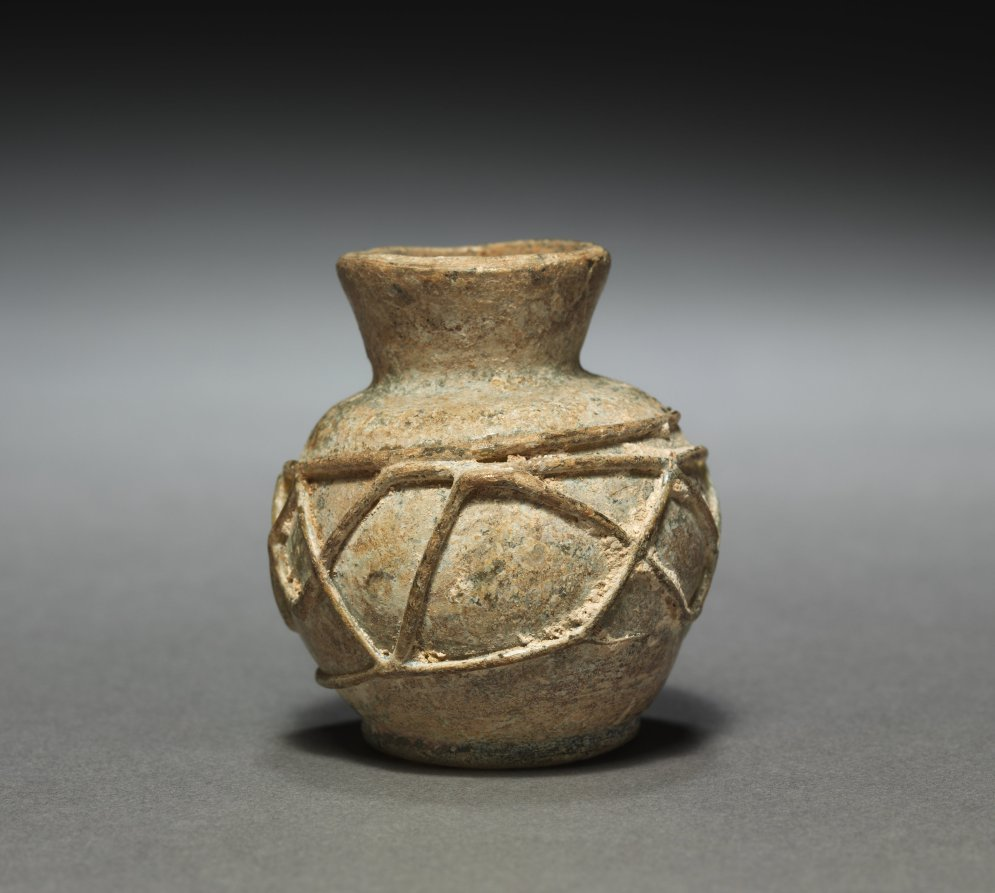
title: Vase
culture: Iran, Sasanian Empire (224–651 CE)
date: c. 224–650 CE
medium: glass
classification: Glass